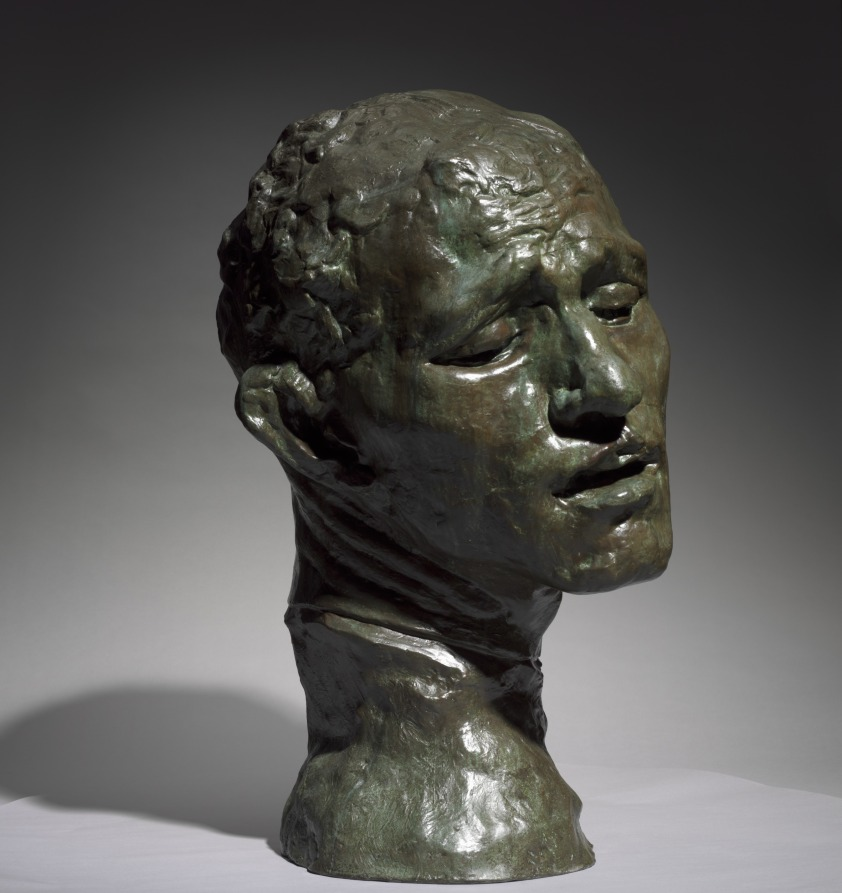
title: Heroic Head of Pierre de Wissant, One of the Burghers of Calais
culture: France, 19th century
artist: Auguste Rodin (French, 1840–1917)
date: 1886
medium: bronze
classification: Sculpture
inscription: inscribed at neck, left: A.Rodin; inscribed lower back: Alexis Rudier/Fondeur-Paris.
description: This sculpture depicts one of the figures in Rodin’s large public monument The Burghers of Calais (1884–89), featuring six French men who volunteered to be taken prisoner by the English in exchange for lifting the siege of Calais during the Hundred Years War (1337–1453). Pierre de Wissant’s anguished expression suggests extreme mental suffering as he contemplates his expected execution. Rodin exhibited a life-size version of the figure as an independent work before completing the monument. He later made multiple versions in various sizes and media.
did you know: This sculpture depicts the head of a figure from Rodin's large public monument The Burghers of Calais (1884-89). The CMA also owns a plaster version of the head.